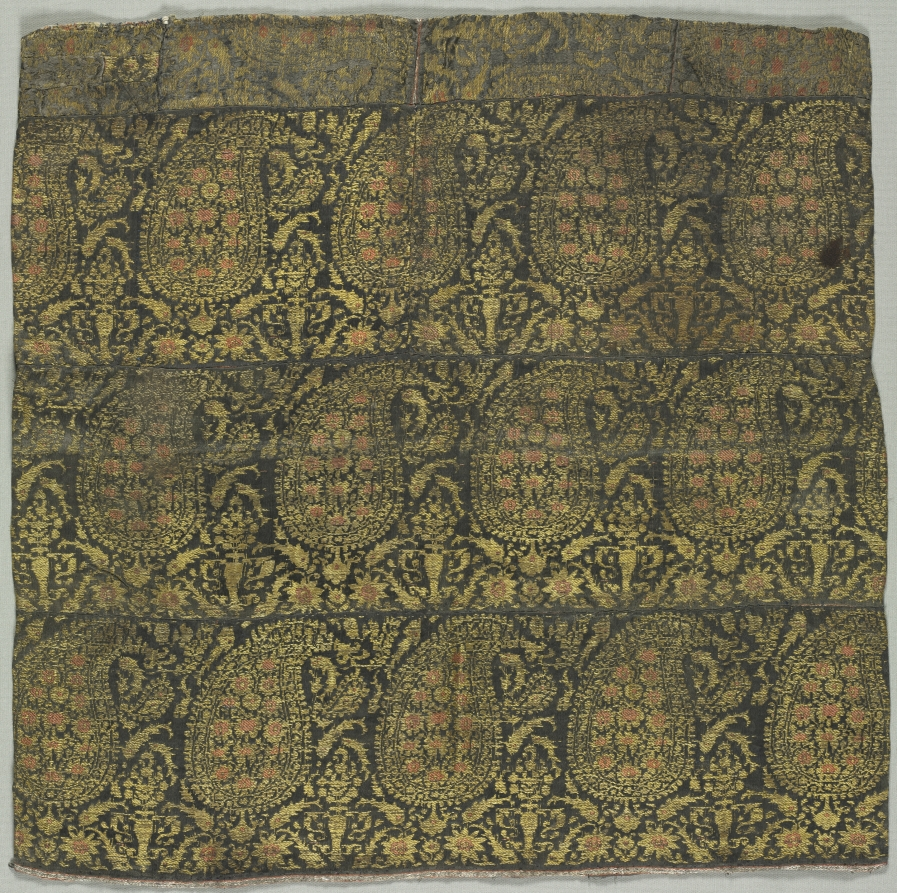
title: Table Square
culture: Iran, 18th century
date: 1700s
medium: lampas weave; silk and silver thread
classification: Textile